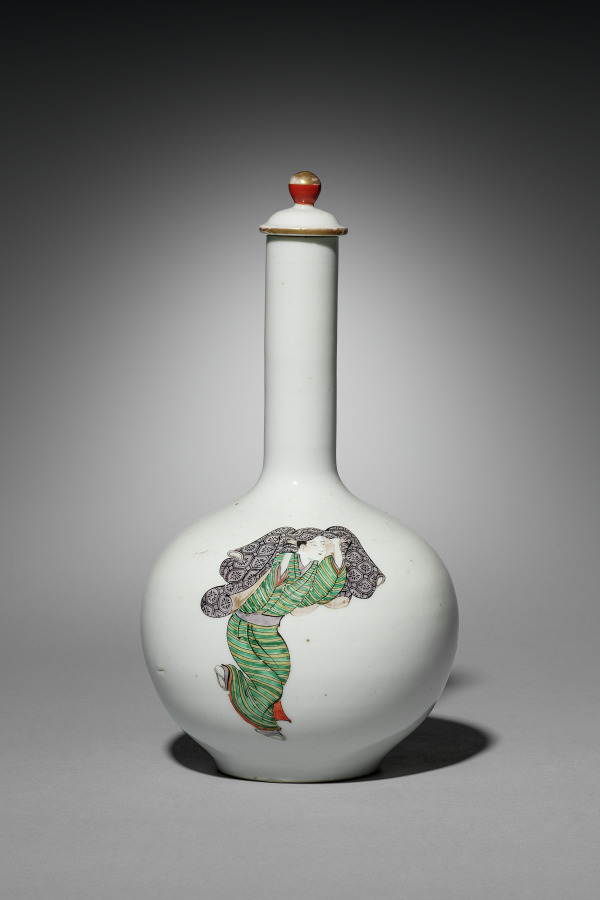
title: Sake Bottle with Three Figures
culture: Japan, Edo period (1615–1868)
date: late 1700s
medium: porcelain with overglaze enamel and gold decoration (Hizen ware, Arita type)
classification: Ceramic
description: The bottle features three elegantly drawn figures: a beautiful woman, a young man, and a priest. The artist used a fine-haired brush to draw these figures in colored enamel onto the porcelain bottle, which had already been given a clear glaze. A final firing fused the enamel to the form. The name derives from the port of Imari from where Japanese porcelains were shipped to other cities in Japan, China, and Europe.